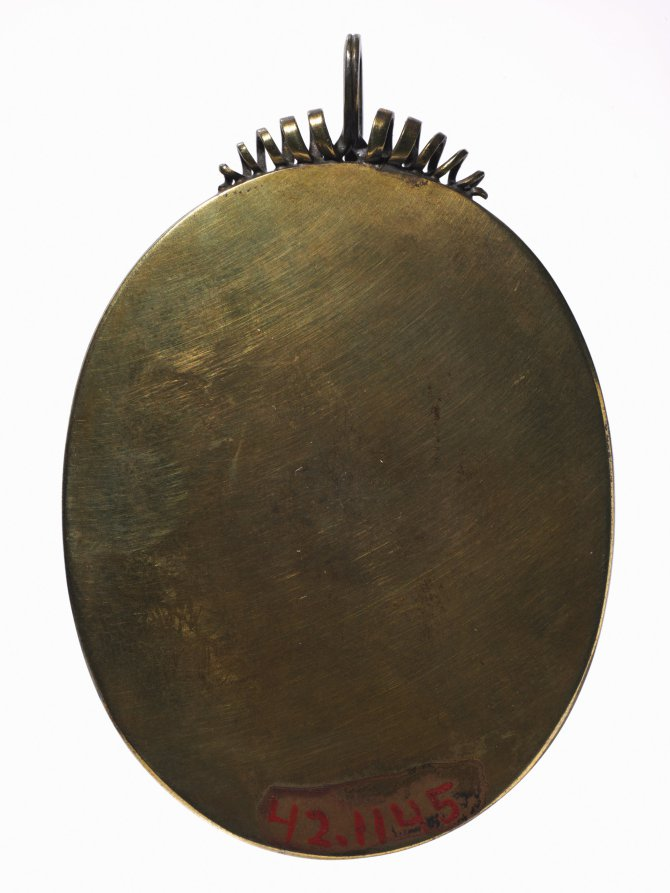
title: Portrait of Frederick V, Elector Palatine, King of Bohemia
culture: England, 17th century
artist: John Hoskins (British, c. 1590–1665)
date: 1630s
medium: watercolor on vellum in a silver gilt frame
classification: Portrait Miniature